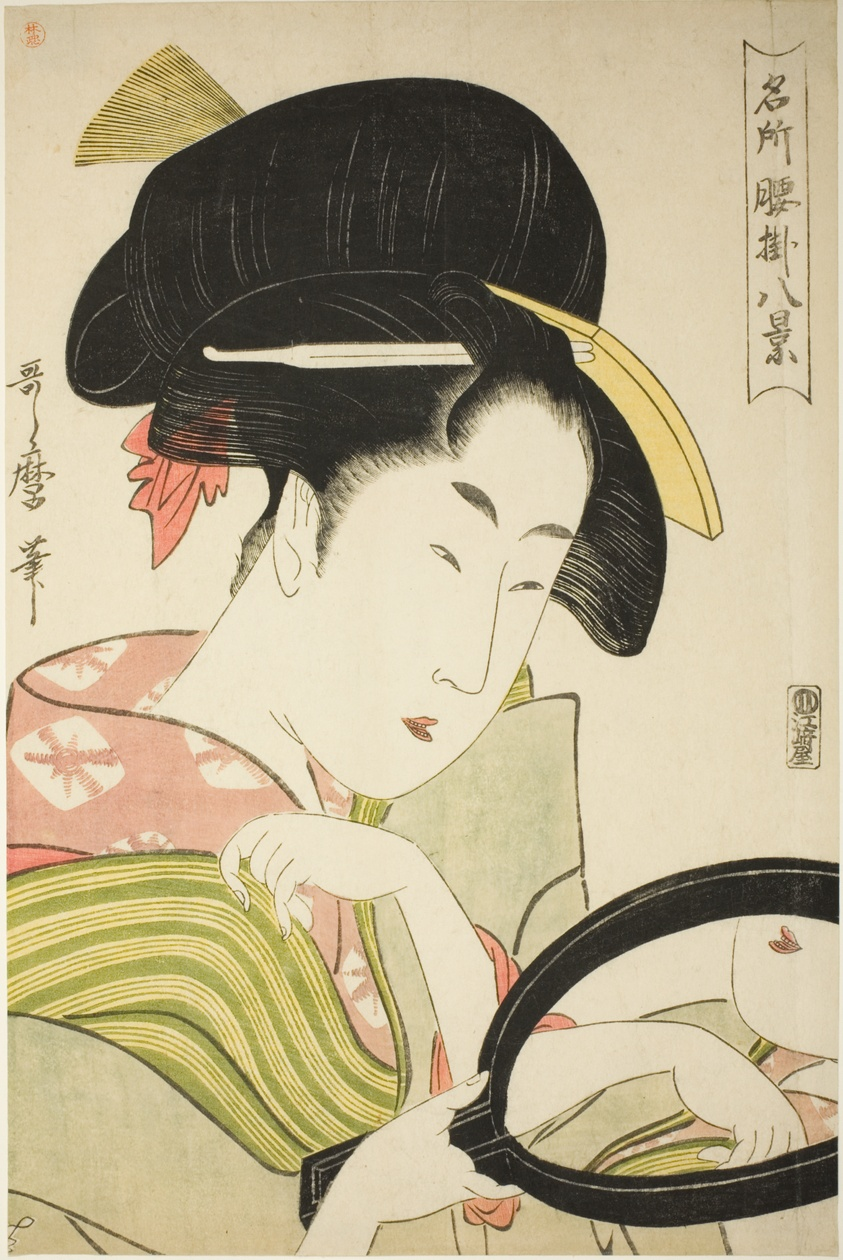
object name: Print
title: Mirror, from the series “Eight Views of Tea-stalls in Celebrated Places" ("Meisho koshikake hakkei")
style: Japanese (culture or style)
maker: Kitagawa Utamaro 喜多川 歌麿; Japanese, 1753 (?)-1806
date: c. 1795/96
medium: Color woodblock print; oban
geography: Japan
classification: woodblock print; print; asian art